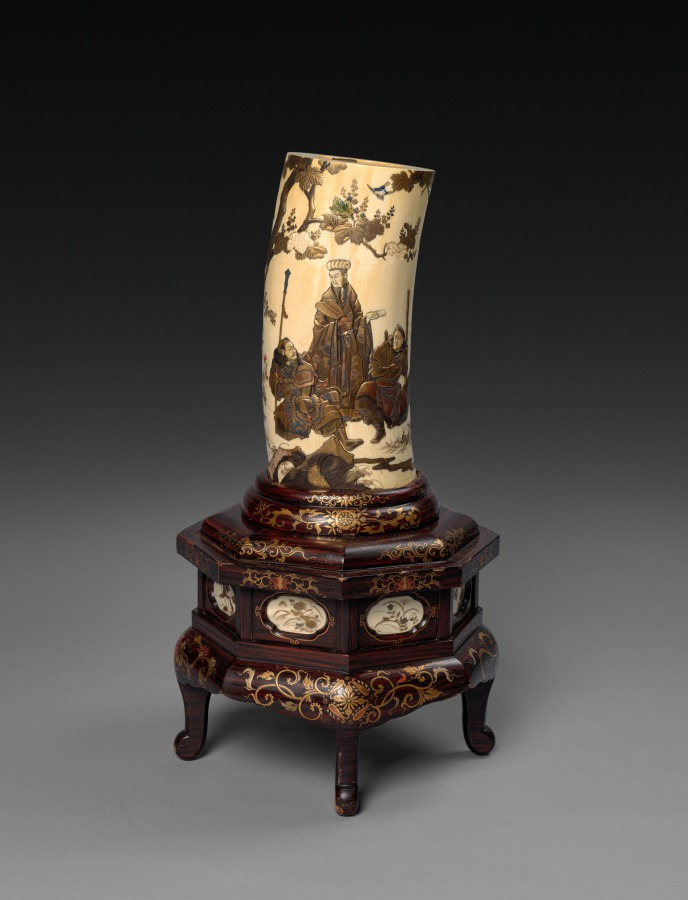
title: Ivory Tusk Vase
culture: Japan, Meiji period (1868–1912)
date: late 1800s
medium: carved ivory, pigment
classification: Ivory